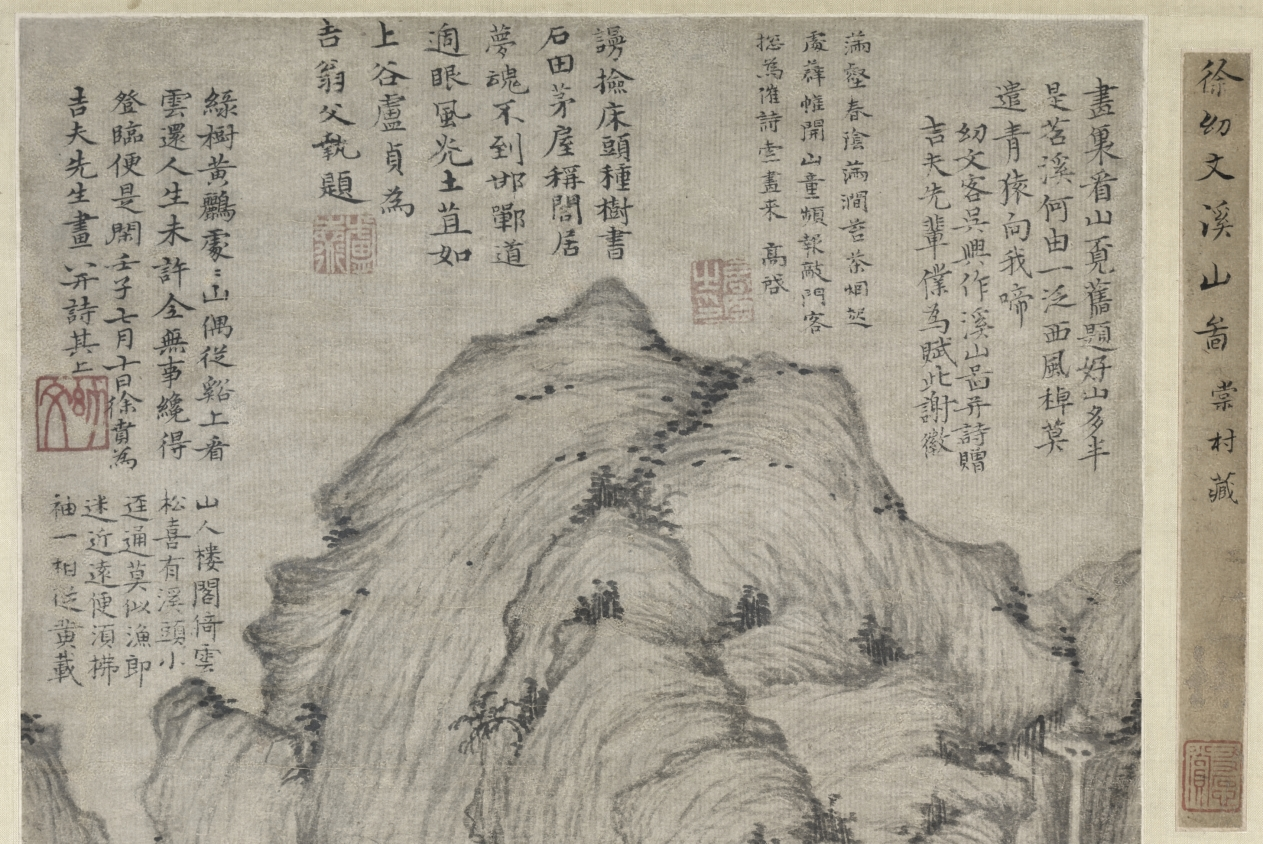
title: Streams and Mountains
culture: China, Yuan dynasty (1271-1368)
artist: Xu Ben (Chinese, 1335–1380)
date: 1372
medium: hanging scroll, ink on paper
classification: Painting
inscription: 綠樹黃鸝處處山， 偶從谿上看雲還。/ 人生未許全無事， 纔得登臨便是閑。 壬子七月十日徐賁為吉夫先生畫 並詩共上 [印] 幼文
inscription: Label on mounting probably by Liang Qingbiao 梁清標 (1620–1691).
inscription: 4 additional inscriptions and 9 additional seals: 1 poem of Xie Hui 謝徽 (c. 2nd half 14th c.); 1 poem and 1 seal of Gao Qi 高啟 (1336–1374); 1 poem and 1 seal of Lu Zhen 盧貞 (c. late 14th c.); 1 poem of Huang Zai 黃載; 3 seals of Liang Qingbiao 梁清標 (1620–1691); 1 seal of Wang Jiqian [C. C. Wang] 王季遷 (1907–2003); 3 seals unidentified.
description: Like many literati of the late Yuan and early Ming dynasties, Xu Ben was entangled with the perils of dynastic change as well as the ups and downs of his official career. It was mainly through the art of painting and poetry, as well as the ideal of reclusion, that he sought feelings of exhilaration and shared them with his friends. Xu created this monumental landscape during one of his periods of reclusion. His innumerable “hemp-fiber” texture strokes create a unifying rhythm among the towering mountains with tightly knit masses of rocks. Nestled among shady trees at the base of the mountain is a rustic retreat, which a scholar approaches on foot to visit with the hermit. Among the five inscriptions at the top of the painting is one by the artist himself. He dedicated the painting to someone named Jifu 吉夫 and recorded a poem in praise of mountains. Green trees, yellow orioles, everywhere are mountains; Aimlessly I return from the stream, where I watched the clouds. Man's life does not allow unbroken ease, But to be able to be high up in the mountain, this is leisure.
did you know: An attendant opens a reed gate to welcome the scholar with a walking stick approaching the rustic retreat.